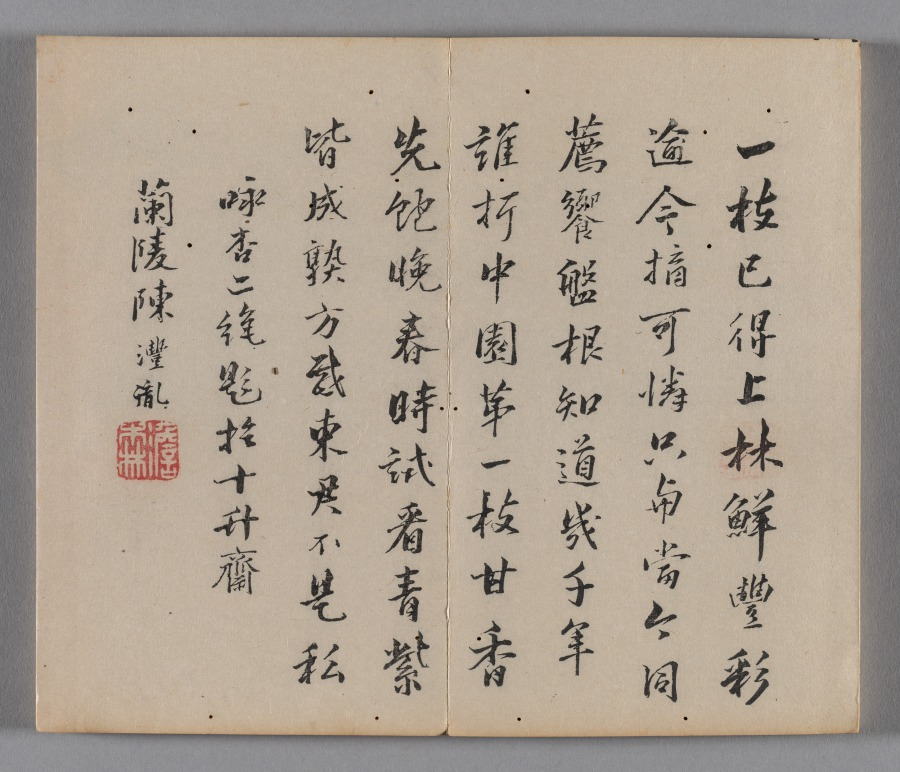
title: Ten Bamboo Studio Painting and Calligraphy Handbook (Shizhuzhai shuhua pu): Fruit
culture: China, Qing dynasty (1644-1911)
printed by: Hu Zhengyan (Chinese, c. 1584–1674)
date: 1633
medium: Woodblock-printed book; ink and colors on paper; first edition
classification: Print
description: Color printing reached a level of perfection in the early 1600s, as seen in this Ten Bamboo Studio Collection of Calligraphy and Painting and the Mustard Seed Garden Manual of Painting (printed 1679 and 1701). The painterly quality, precision in registering (aligning) the woodblocks, and harmonious colors made them the most successful color print editions in Chinese history. Both editions were printed and compiled in Nanjing, spread nationwide, and had a great impact on the arts in Japan and Korea.